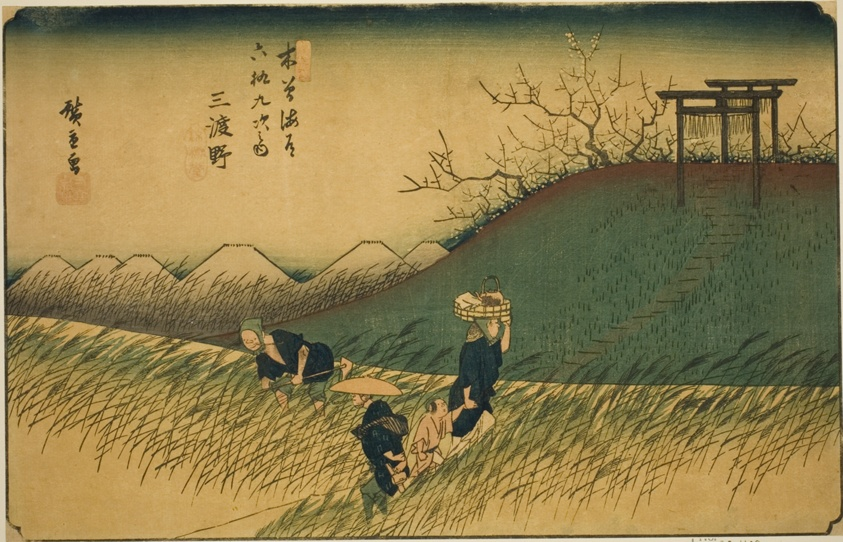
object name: Print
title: No. 42: Midono, from the series "Sixty-nine Stations of the Kisokaido (Kisokaido rokujukyu tsugi no uchi)"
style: Japanese (culture or style)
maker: Utagawa Hiroshige 歌川 広重; Japanese, 1797-1858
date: c. 1835/38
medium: Color woodblock print; oban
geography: Japan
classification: woodblock print; print; asian art